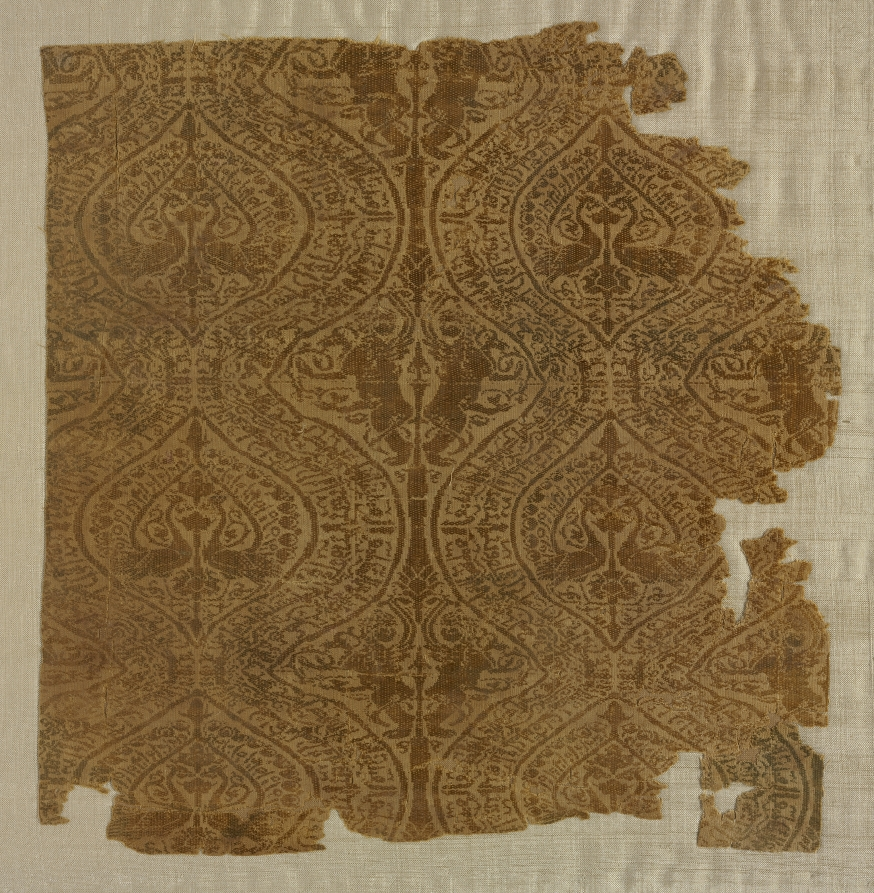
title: Fragment with peacocks in ogival pattern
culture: Iran or Iraq, possibly Rayy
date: 1004–1260 (radiocarbon date, 95% probability)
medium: Silk: plain weave with supplementary weft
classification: Textile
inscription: Pseudo-Arabic decorative inscriptions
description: Neither the design nor the technique of this silk provides clues to whether it was woven in Iran or Syria. As Iran and Iraq fell to the Mongol armies during the second quarter of the 1200s, many artisans fled to Syria, taking with them the techniques and patterns with which they were familiar. The inscriptions are purely decorative.